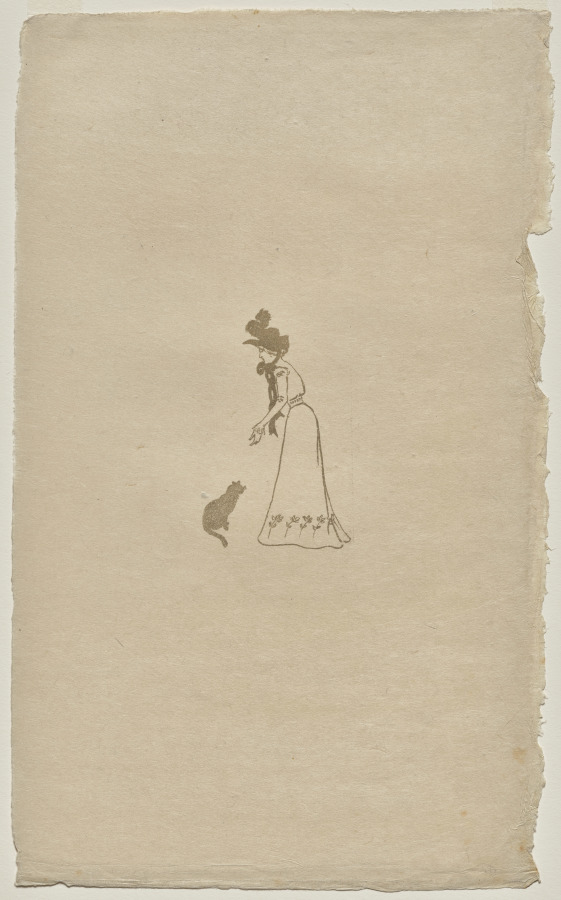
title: Sagot's Gallery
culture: France, 19th century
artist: Georges Alfred Bottini (French, 1874–1907)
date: 1898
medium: color proof of the Remarque Woman with Cat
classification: Print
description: The last decades of the 19th century was the golden era of French color lithography. Jules Cheret (1836–1932) popularized the technique to make colorful posters which, by 1884, were also exhibited as a legitimate art form. In 1891 Cheret began to design posters without lettering to frame and hang on walls—still an unusual idea since prints were usually stored in portfolios. The explosion in color lithography was also encouraged by the use of zinc plates, which were lighter, cheaper, and more pliable than traditional lithographic stones. Also important was the formation of artist's organizations like the Société des artistes lithographie (Society of Lithographic Artists) and the Société de l'estampe originale (Society of Original Prints), which stimulated original printmaking. By the 1890s a proliferation of fine printers, independent exhibitions, publications devoted to prints, critics, publishers, and dealers like Sagot, all supported color lithography.